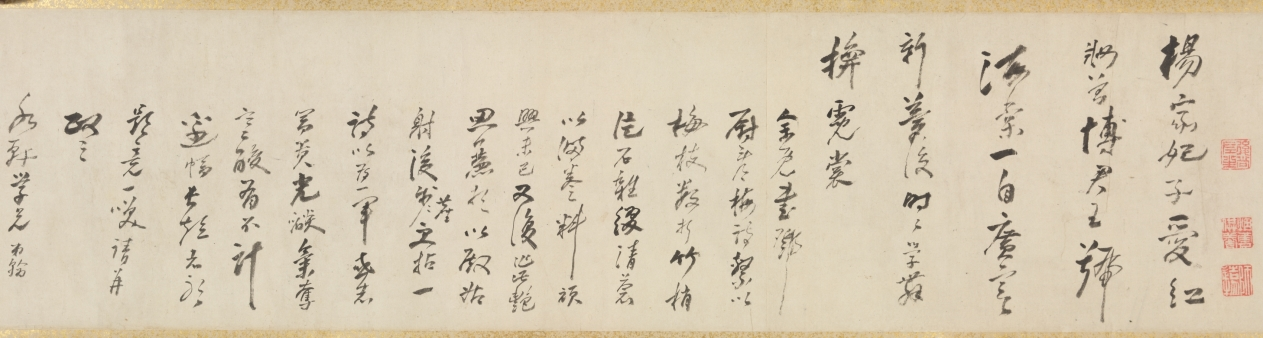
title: Plum Blossoms and Peonies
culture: China, Qing dynasty (1644-1911)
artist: Gao Fenghan (Chinese, 1683–1749)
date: 1741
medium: handscroll, ink on paper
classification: Painting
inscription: Artist's 2 inscriptions and 9 seals (the painting of Peonies with the artist's colophon and the colophon by Hou Chia-fan are on a single sheet of paper). Artist's inscription and 2 seals (Plum Blossoms): [seal] Ts'ai-yün. After finishing writing my colophon, I unrolled the painting to take another look, and it now seems that the composition here should have moved to the later part of the scroll. If that is the case, then the "Cool Beauty" [prunus] of the Solitary Hill is after all unable to take precedence over the "King of Flowers" [peony]. A laugh. Lao-fou inscribed. [seal] Feng-han. Artist's colophon (Plum Blossoms): [3 seals] Tun; Yen-yün-kung-yang, Hou-shang-tso-sheng. A few days after I painted this scroll for Shui- hsien [Yüeh Meng-yüan], the plum blossoms were in full bloom at his residence. He invited me over to enjoy them together for a long while, and I composed two additional poems and wrote them down here for his criticism. [Poems on the colophon are not translated.] First month, twenty-first day, your junior, Kao Feng-han of Nan-fou drafted this with the left hand. [seal] Feng-han. Artist's inscription and 4 seals (Peonies): Brushed with the left hand in the hsin-yu year [1741]. [seal] Yu-hsi. [3 seals at end of painting] Hou-shang-tso-sheng; Yen-yün-kung-yang; Shih-tsao-wu. Artist's colophon and seal (Peonies): The imperial concubine from the Yang family loved to dress in red, And from the emperor won the title of Hai-t'ang. But ever since she became the new dream of the moon palace, She changed into rainbow colors, while learning to dance. After I wrote the poem on Looking for Plum Blossoms in the Teng-wei Mountains, I attached to it a few branches of prunus, some bamboo tips and a piece of rock, with a scattering of green [moss] here and there to fill up the scroll. Unexpectedly, my playful fascination [with these subjects] was still not quite satisfied, so I made up these amorous ideas and romantic images [of the peony], to follow the footsteps of the fair lady of the Ku-hsieh Mountain [prunus]. Furthermore, I picked out one poem to be my vanguard. Perhaps such luminosity of wealth and power will be enough to overwhelm the poor fellows, and [they] will not mind the comparatively short length [of paper] assigned to it. Amusingly inscribed. Please correct me again. To Shui-hsien, my learned senior, your junior Han inscribed again. [seal] Tso-hua [left-handed painting]. 1 additional colophon and 5 additional seals: 1 colophon, dated 1742, and 3 seals of Hou Chia-fan (act. ca. 1742); 1 seal of P'u Ch'üan (20th c.?); 1 seal of Li family (dates unknown).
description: One of the so-called Yangzhou Eccentrics (a group of painters who lived in Yangzhou and were known for their unorthodox art and lifestyle), Gao Fenghan depicts China’s two most loved flowers in full bloom—the “cold beauty,” or plum blossom, in the first section, and the “king of flowers,” or peony, in the second section. Painted in 1741, the year when Gao decided to leave the south and return home to Shandong province in eastern China, this work was likely a token of farewell. His casual brushwork may indicate his mental and physical struggle at the time. After having crippled his right hand in 1737, Gao used his left hand to paint and achieved a crudeness and eccentric style unattainable before.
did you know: In East Asian art, peonies traditionally symbolize prosperity and wealth.